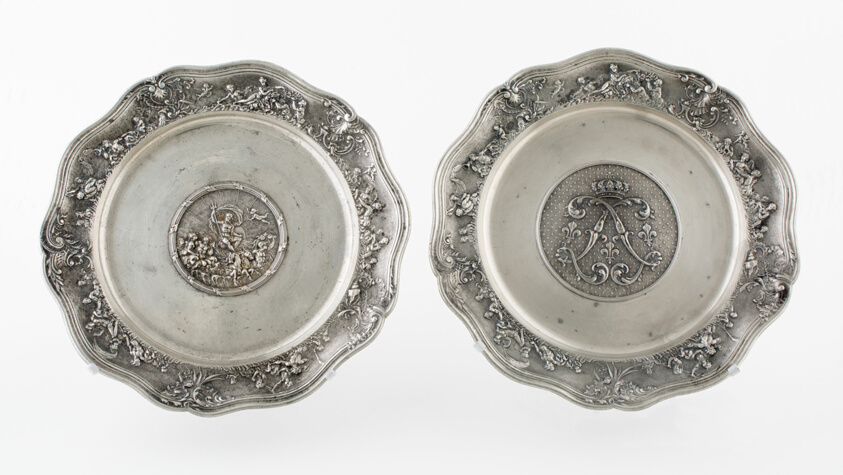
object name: Metalwork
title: Plates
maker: Jules-Paul Brateau; French, 1844-1923; Paris, France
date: c. 1892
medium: Pewter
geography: France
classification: plate (general, dish); dish (vessel); european decorative arts; ceramics; metalwork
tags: mythology, Neptune